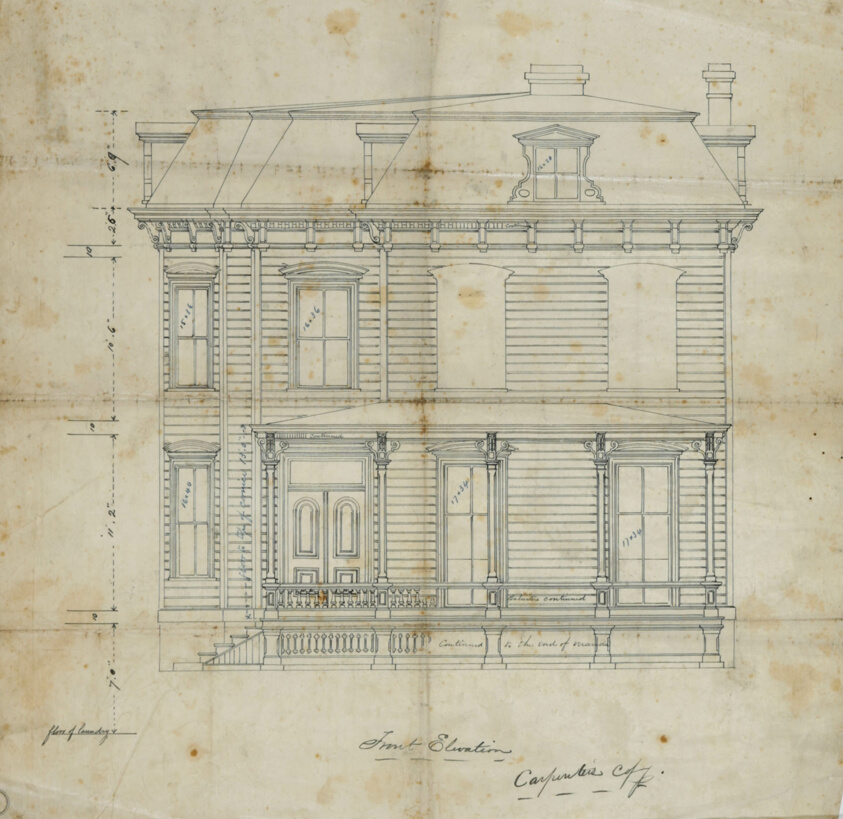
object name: Architectural Drawing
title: Charles R. Larrabee House, Chicago, Illinois, Front Elevation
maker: Edward Burling (American, 1819–1892)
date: c. 1863/64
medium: Ink on linen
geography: Chicago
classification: working drawing; architecture; architectural drawing